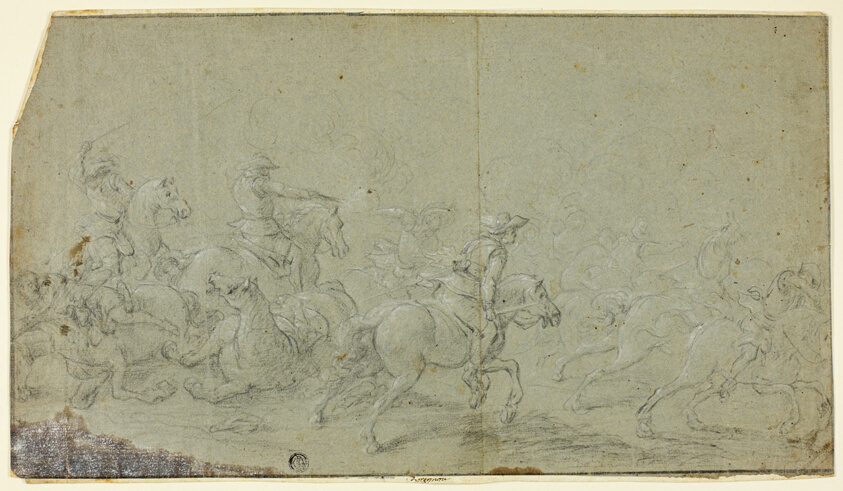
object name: Drawing and Watercolor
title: Cavalry Fight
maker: Follower of Jacques Courtois (French, 1621-1675)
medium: Black chalk, heightened with white chalk, on greenish-blue laid paper, perimeter mounted on cream laid paper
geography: France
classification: chalk; drawings (visual works); prints and drawing